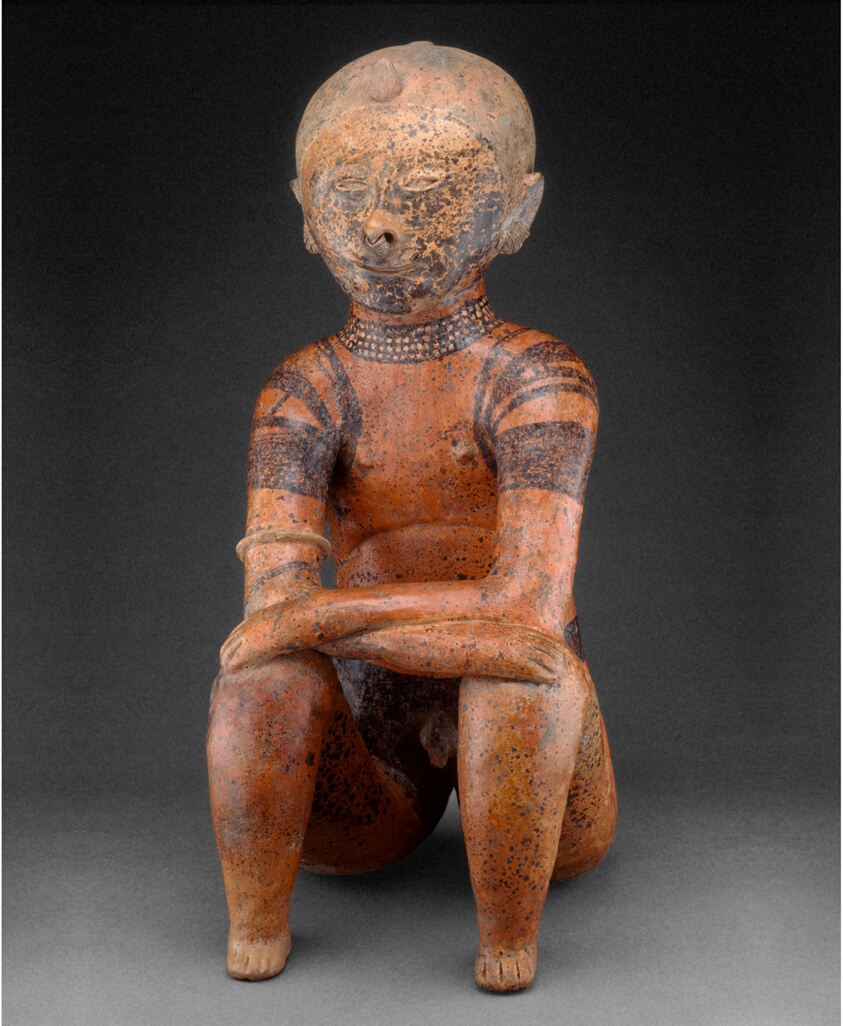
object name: Sculpture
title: Figure of a Seated Chieftain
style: nayarit, west mexico, mesoamerican, lagunillas, americas, Arts of the Americas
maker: Nayarit (Lagunillas area, Nayarit, Mexico)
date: 100 BCE–250 CE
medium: Ceramic and pigment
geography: Nayarit state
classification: ceramics; earthenware; art of the americas; sculpture; funerary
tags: people, offering, ancestors, rulers (people), rulership, tattoos